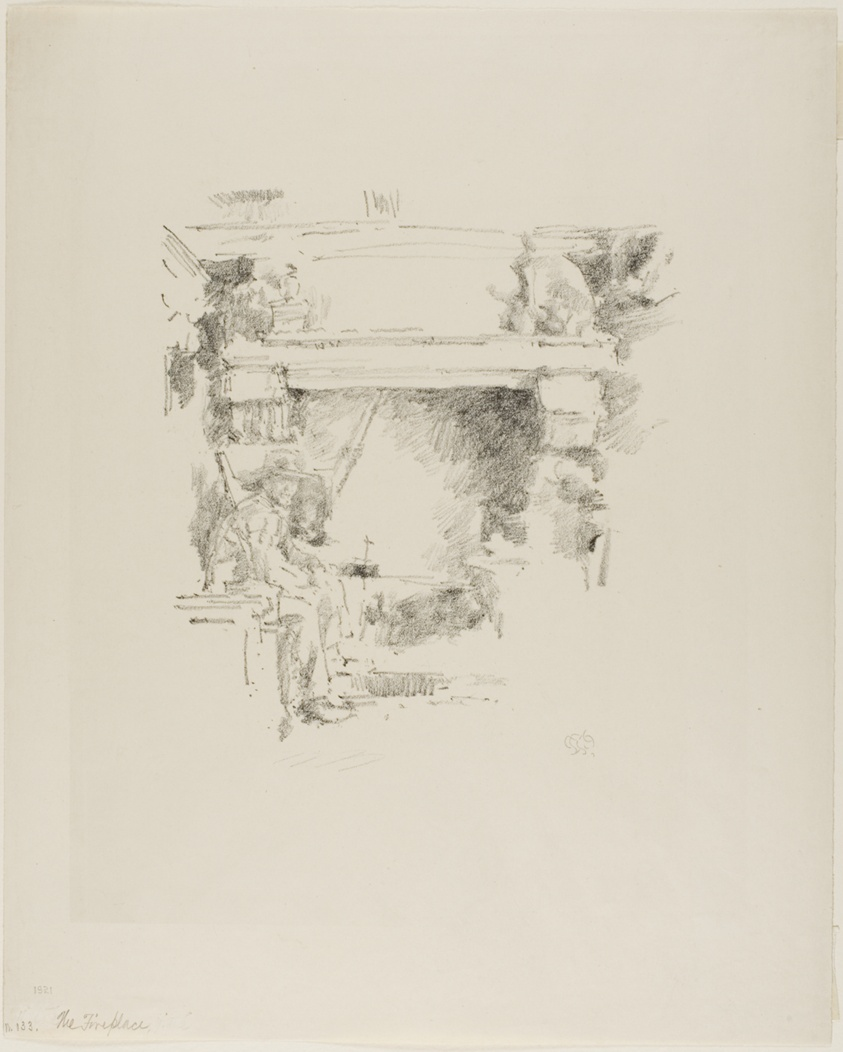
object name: Print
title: The Fireplace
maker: James McNeill Whistler (American, 1834-1903)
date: 1893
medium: Transfer lithograph in black on ivory wove proofing paper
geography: United States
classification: transfer lithograph; lithograph; print; prints and drawing; paper